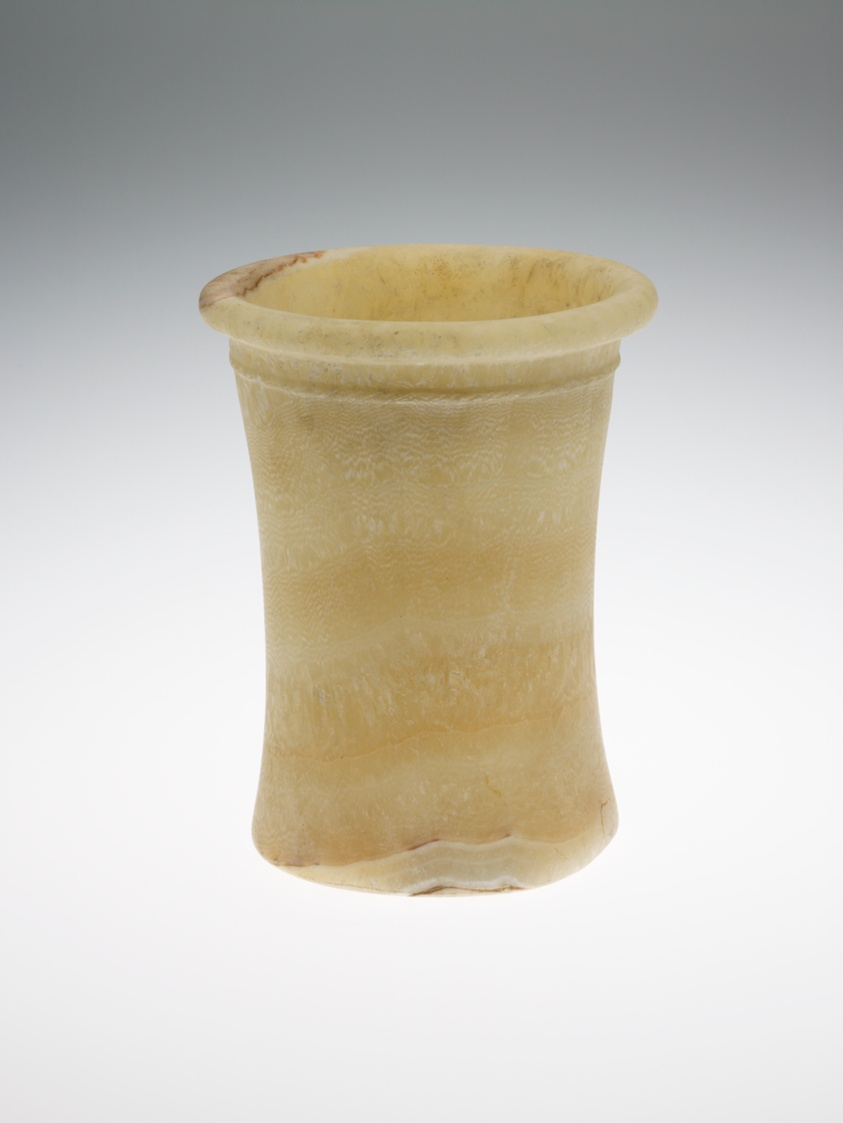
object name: Vessel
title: Jar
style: first dynasty, early dynastic (egyptian), ancient, egyptian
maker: Egyptian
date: Early Dynastic Period–Old Kingdom, Dynasty 1–4 (about 3000–2498 BCE)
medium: Travertine (Egyptian alabaster)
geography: Egypt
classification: vessel; stone; ancient art